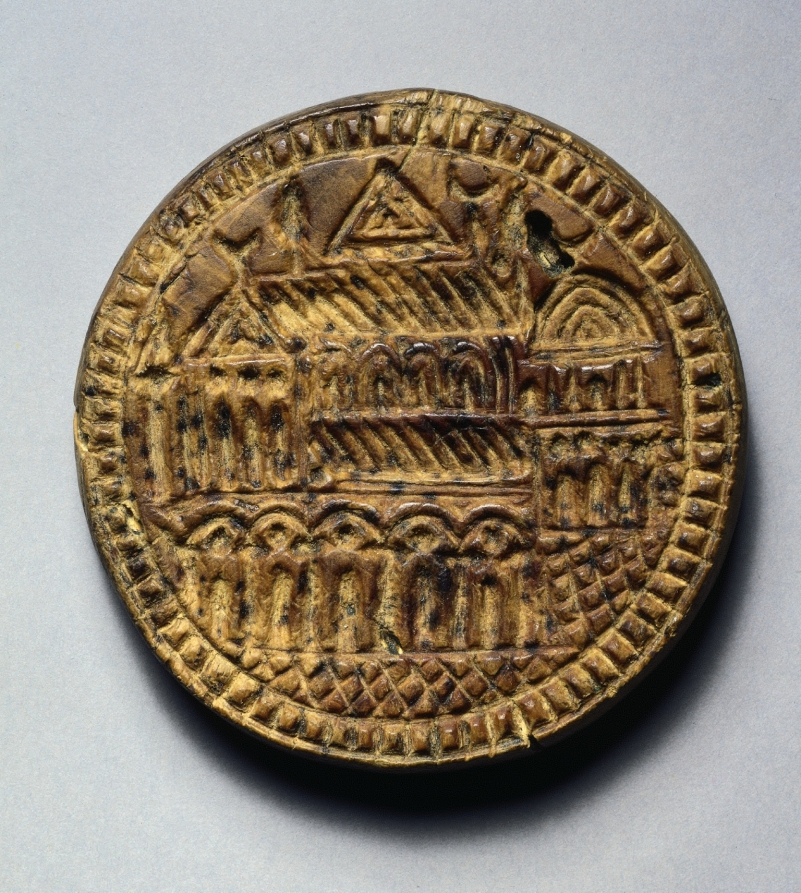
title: Mold for a Eulogia (Blessing) Bread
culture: Byzantium, Palestine, Byzantine period, 7th-10th century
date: 600s-900s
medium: wood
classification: Sculpture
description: It was a common early Christian practice to stamp images and inscriptions into loaves of bread using special molds. Representing the Church of the Holy Sepulcher on Mount Golgotha--the hill outside Jerusalem on which Christ was crucified and entombed--this wooden mold was probably used to stamp loaves of bread distributed to pilgrims visiting Jerusalem, in commemoration of their journey.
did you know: Medieval Christian pilgrims often traveled months or years to religious sites in the Holy Land and returned home with blessed mementos of their journey, such as vials of holy water, relics from saints, and even special loaves of bread. This mold was used to mark bread with an image of the Church of Holy Sepulchre in Jerusalem; the bread was then distributed to pilgrims.